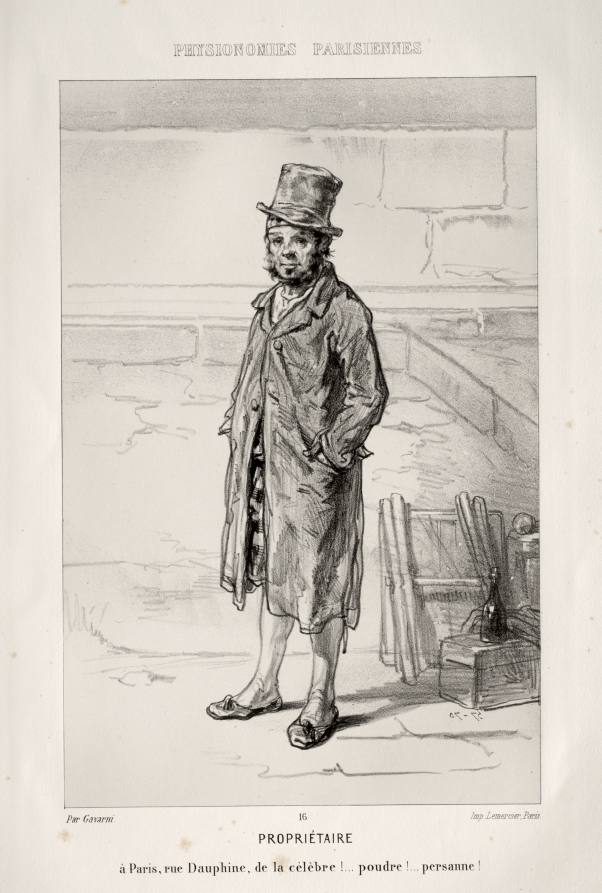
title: Propriétaire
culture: France, 19th century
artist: Paul Gavarni (French, 1804–1866)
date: c. 1857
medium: lithograph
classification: Print